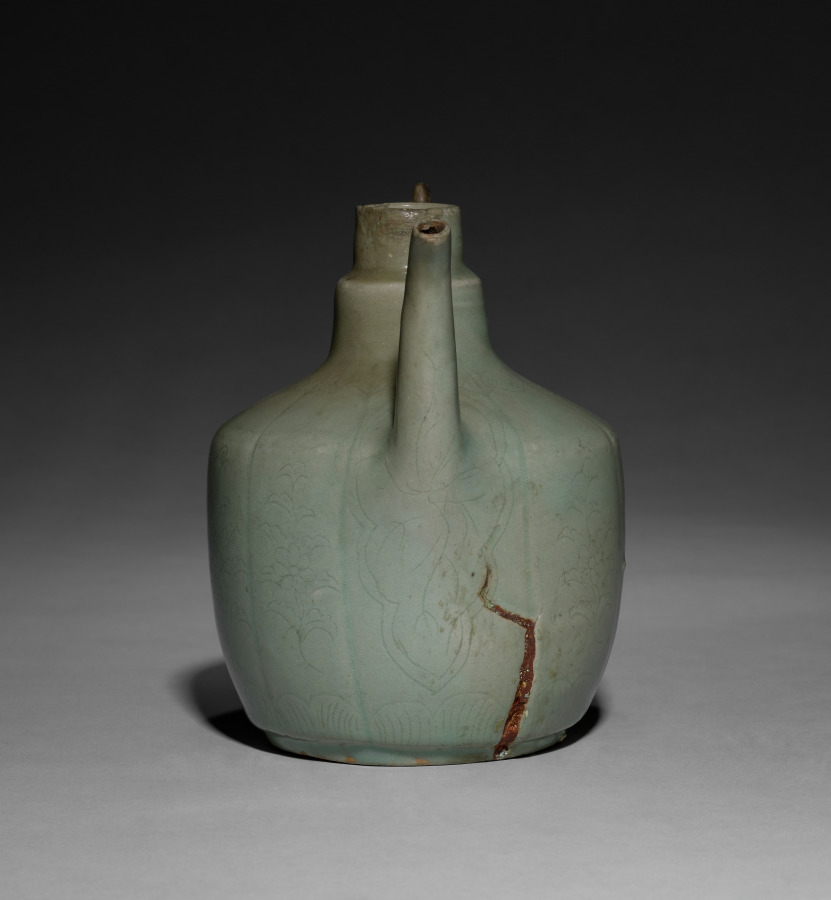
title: Wine Pot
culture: Korea, Goryeo dynasty (918–1392)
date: 918–1392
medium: pottery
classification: Ceramic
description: As early as the seventh century, the practice of drinking tea and wine became an important part of elite culture in Korea. Elites of the Goryeo period commissioned a variety of types of utensils and vessels including this elegant wine pot, not only to make their drinking experience more exciting, but also to show their appreciation of nature.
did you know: A chain or cord once connected a small loop on the handle and the lid to serve beverages without spilling.